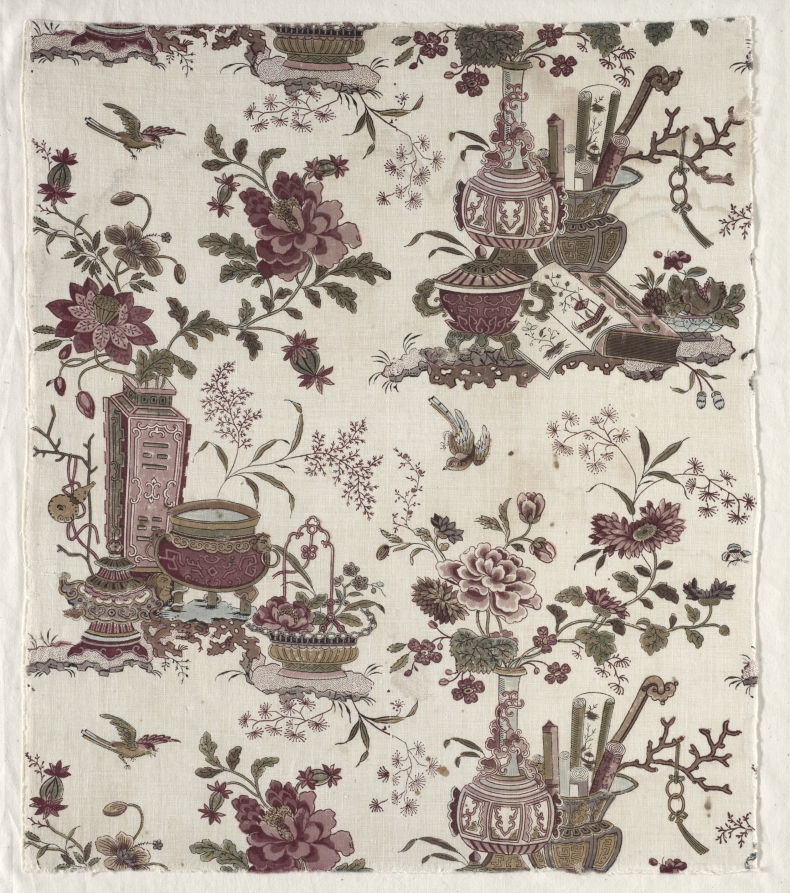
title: Fragment of Woodblock Printed Cotton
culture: France, 18th century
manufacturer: firm of Christophe Philippe Oberkampf (French, 1738–1815)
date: c. 1780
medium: woodblock print on cotton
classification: Textile